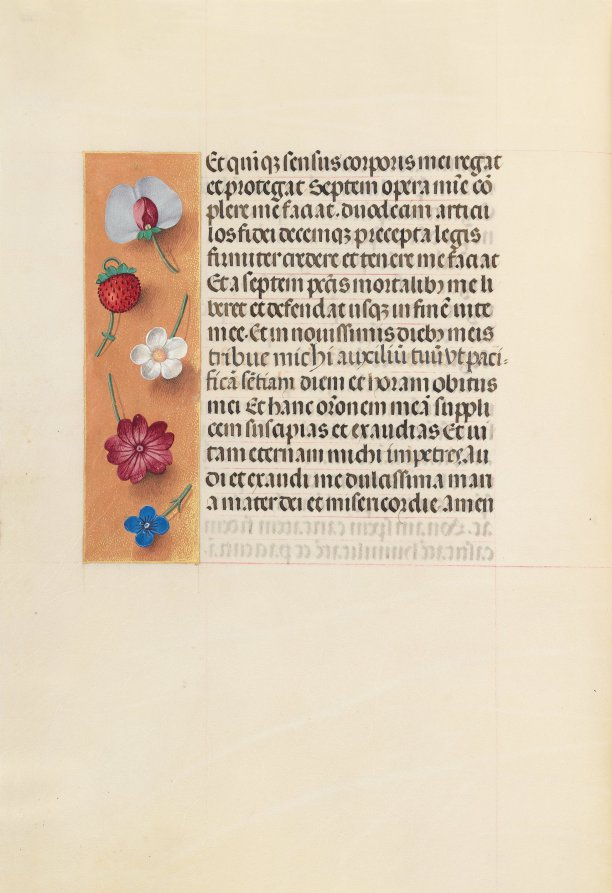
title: Hours of Queen Isabella the Catholic, Queen of Spain: Fol. 260v, Pieta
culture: Flanders, Ghent and Bruges, late 15th century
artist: Master of the First Prayerbook of Maximillian (Flemish, c. 1444–1519)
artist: and Associates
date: c. 1500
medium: ink, tempera, and gold on vellum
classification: Bound Volume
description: This manuscript was illuminated by a circle of at least five highly organized manuscript painters active in the Flemish cities of Ghent and Bruges. The principal illuminator was Alexander Bening, who painted the majority of the book's miniatures. Manuscripts produced by this circle of artists are renowned for the decoration of their borders, which typically feature a rich variety of realistically-painted flowers, birds, and butterflies. This prayer book, called a book of hours, was intended not for a cleric, but for the private devotions of a lay person-in this case, Isabella the Catholic, Queen of Spain (1451-1504). Isabella's coat of arms embellishes the book's frontispiece. It is unlikely that the book was commissioned by the Queen herself; rather, she probably received it as a diplomatic gift from someone courting her patronage, perhaps Cardinal Francisco Jimenez de Cisneros. A Franciscan friar, Jimenez was dependent upon Isabella for his advancement, first to the post of Queen's confessor in 1492, and then to Archbishop of Toledo in 1495.